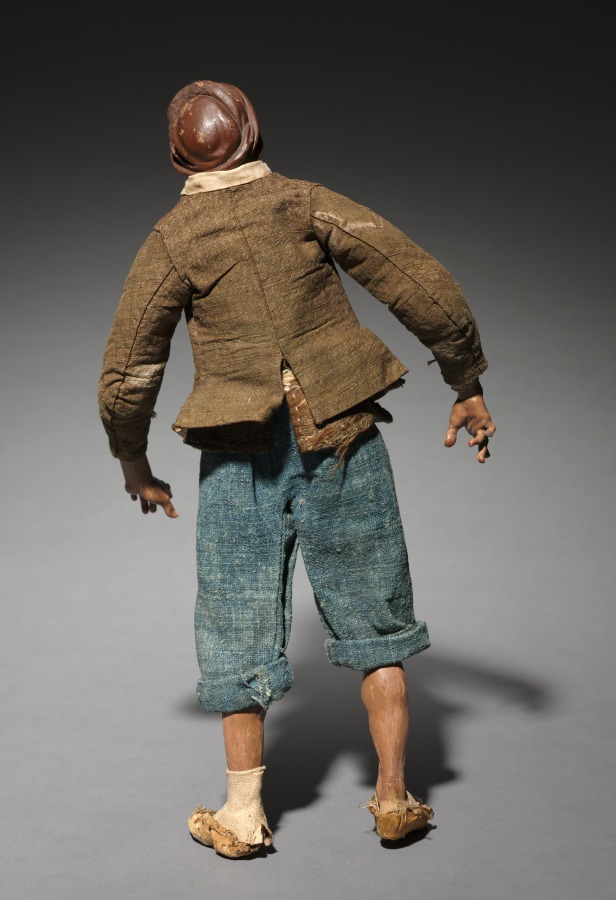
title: Figure from a Crèche: Shepherd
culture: Italy, Naples, late 18th-early 19th century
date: 1780–1830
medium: painted wood and terracotta with various textiles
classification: Sculpture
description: The practice of creating scenes of the Nativity for the home dates from the early 1700s in Italy, where people began to set up doll-like figures of about a foot or less in height. The custom was particularly popular in Naples around 1800, where crèche scenes (crèche means cradle, or crib) included many figures, whose heads and hands of painted terracotta, stuffed cloth bodies, and clothing adapted from contemporary local costumes gave them an amazingly realistic character. Representations of the birth of Jesus can be traced to the first few centuries of Christianity. Both living creatures and sculptural depictions of them were used from early times. By the late middle ages it was customary to create life-size figures of wood or stone, naturalistically painted, to represent the characters who participated in the events of Jesus's early life. These sculptures were then arranged in scenes illustrating one or both of the most important of these events, the Adoration of the Shepherds and the Adoration of the Magi-the three kings from the East who came to pay homage to the Christ child. Used in churches, these large figures were especially popular in Italy, Central Europe, Spain, and Portugal.